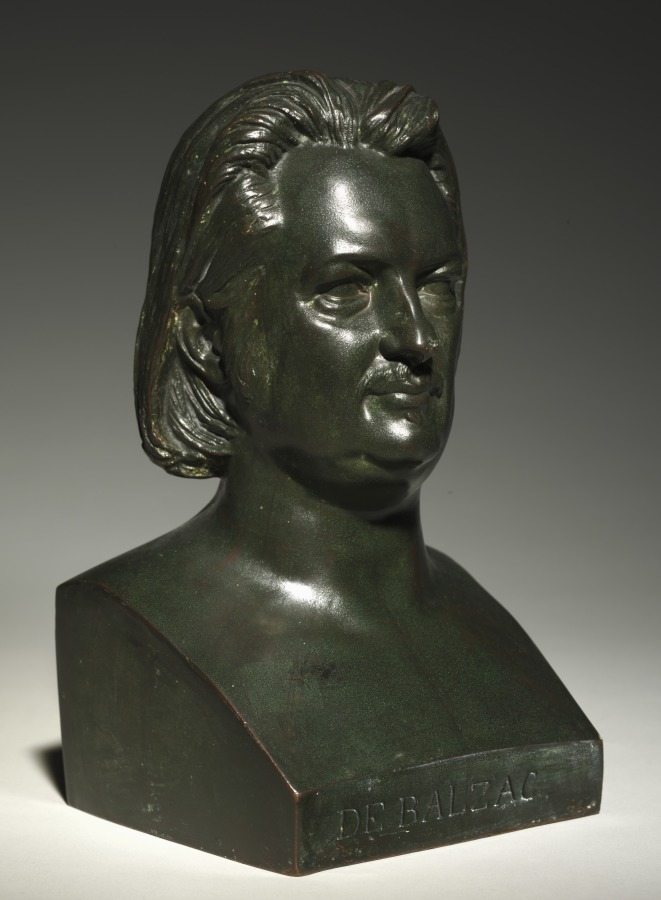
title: Head of Balzac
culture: France, 19th century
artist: Pierre-Jean David d'Angers (French, 1788–1856)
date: 1844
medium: bronze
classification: Sculpture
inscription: inscribed in lower front: "DE BALZAC." The artist's name and date ("DAVID DANGERS/1844") are inscribed on the left side, and the foundry's name ("F. BARBEDIENNE FONDEUR") is inscribed on the back. All inscriptions were made in the mold.